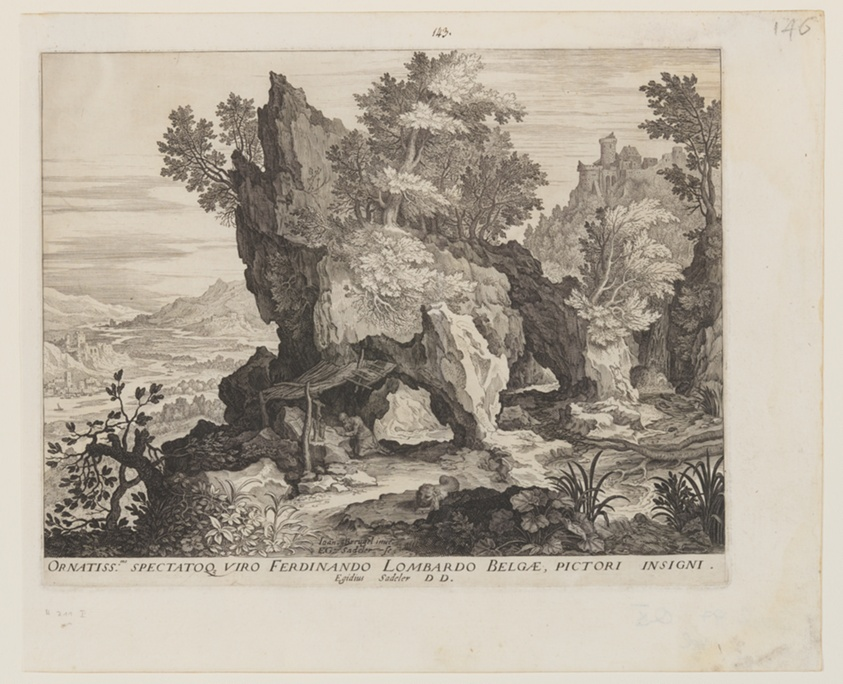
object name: Print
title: Rocky Landscape with St. Jerome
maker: Aegidius Sadeler II (Flemish, c. 1570–1629); after Jan Brueghel the Elder (Flemish, 1568–1625)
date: c. 1590-1620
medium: Engraving on ivory laid paper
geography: Flanders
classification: print; paper; prints and drawing; engraving